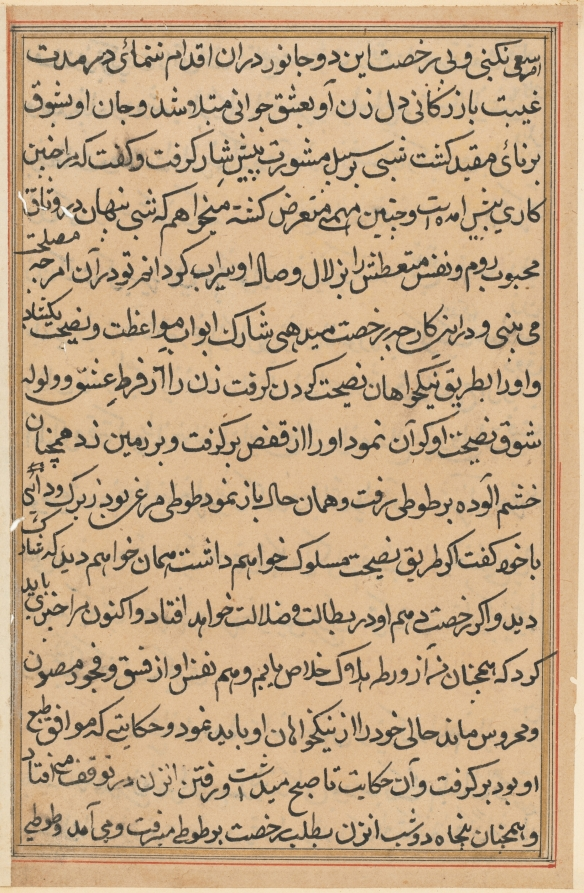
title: Page from Tales of a Parrot (Tuti-nama): text page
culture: Mughal India, court of Akbar (reigned 1556–1605)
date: c. 1560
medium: gum tempera, ink, and gold on paper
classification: Painting